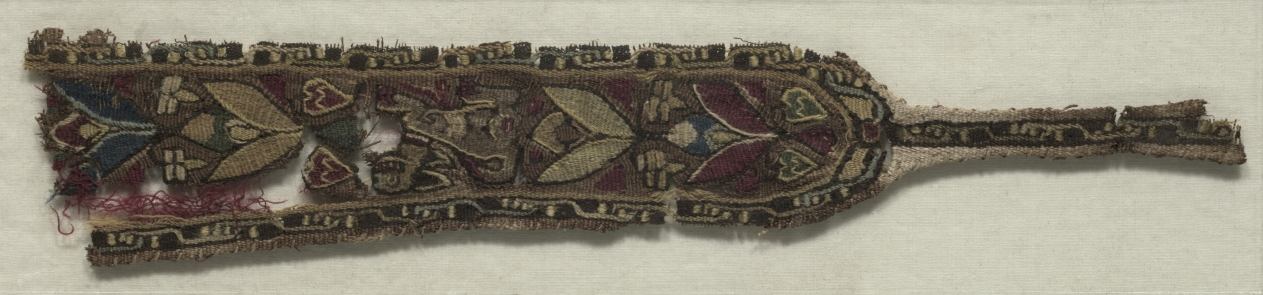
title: Fragment of a Clavus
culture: Egypt, Abbasid period (?), 8th century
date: 700s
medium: tapestry; linen and wool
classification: Textile